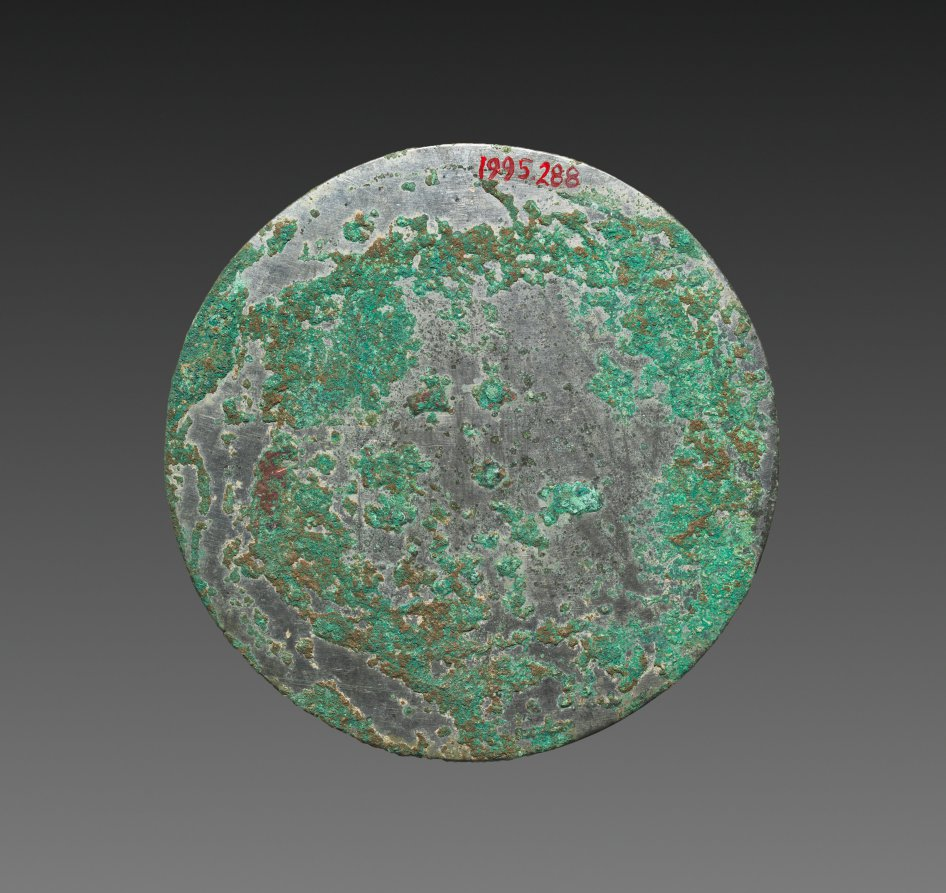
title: Mirror with Clouds and Nebulae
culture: China, Western Han dynasty (206 BCE–8 CE)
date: 200–100 BCE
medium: bronze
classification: Metalwork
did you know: Mirrors provided literal reflection and were decorated with symbolic imagery that illuminated universal themes.